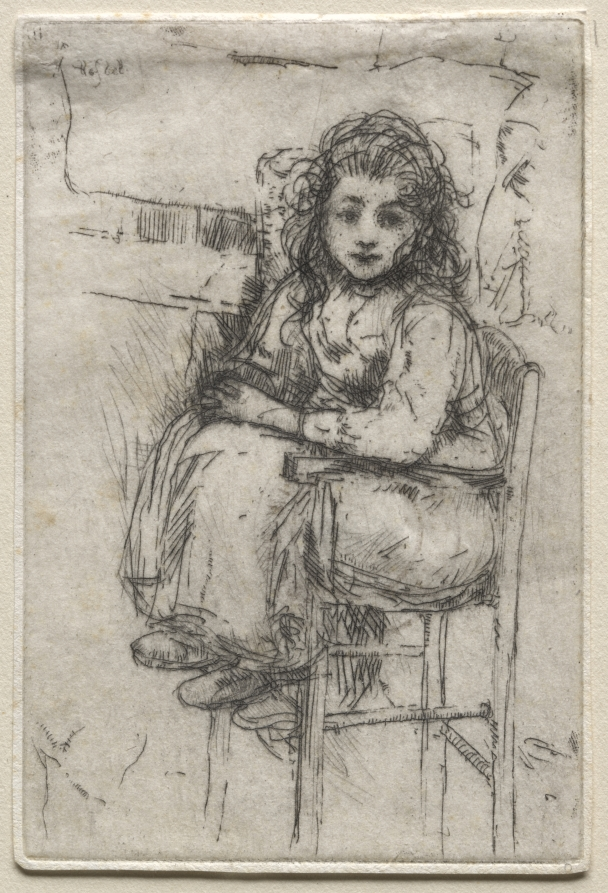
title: Paris: The Scavenger's Daughter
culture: America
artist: Ernest Haskell (American, 1876–1925)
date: 1910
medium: etching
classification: Print